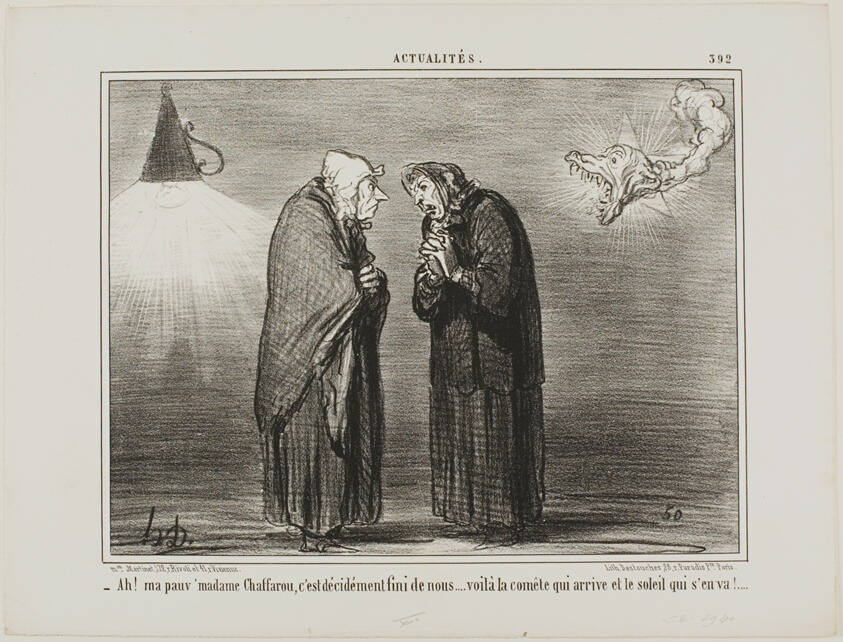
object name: Print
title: “- Ah, my dear Madame Chaffarou... this surely must be the end... the comet is coming and the sun is going,” plate 392 from Actualités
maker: Honoré Victorin Daumier; French, 1808-1879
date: 1857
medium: Lithograph in black on white wove paper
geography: France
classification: lithograph; print; prints and drawing